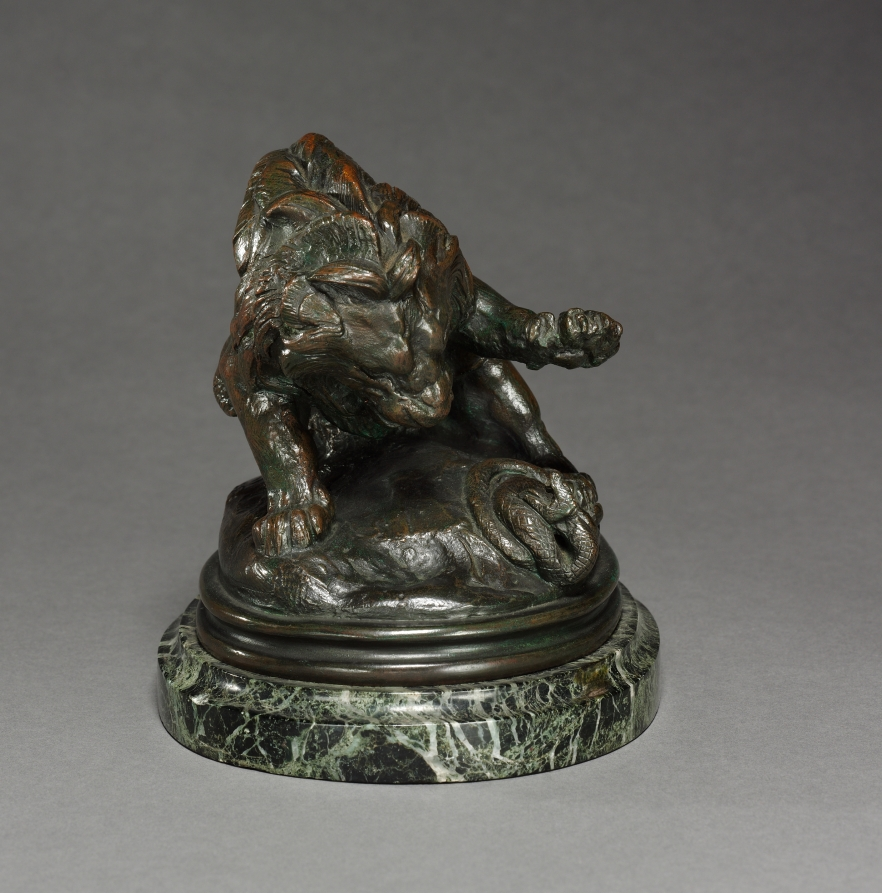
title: Lion and Serpent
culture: France, 19th century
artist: Antoine-Louis Barye (French, 1796–1875)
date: c. 1830 – 1875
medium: bronze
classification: Sculpture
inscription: Signed: "Barye"